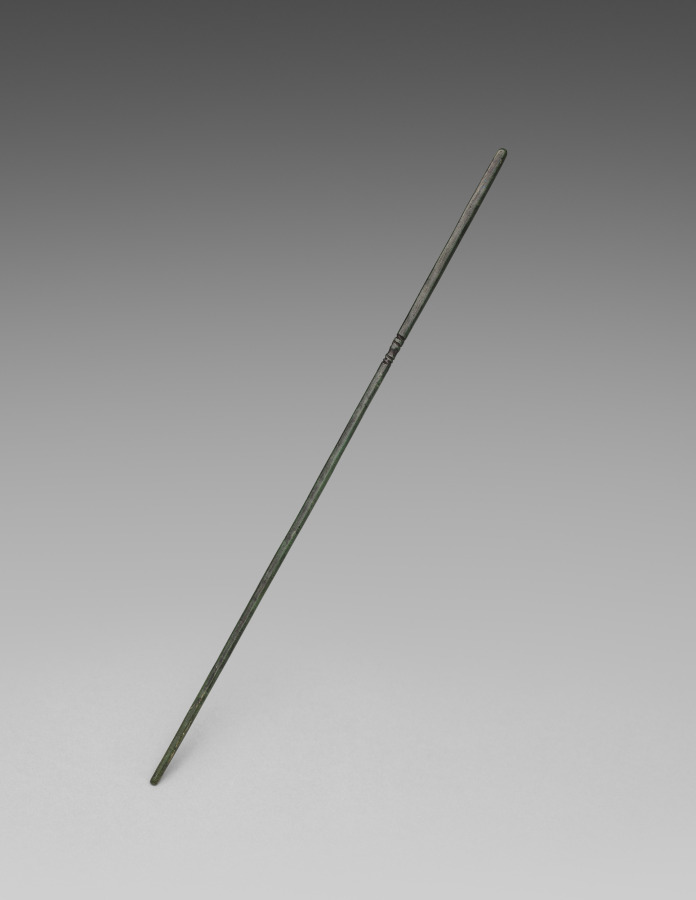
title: Chopstick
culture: Korea, Goryeo dynasty (918–1392)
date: 918–1392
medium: bronze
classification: Metalwork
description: In Korea, chopsticks made of metal such as brass, silver, and gold were excavated from ancient tombs and ruins dated to the 6th century at the earliest. Burial goods often include utilitarian objects such as table wares and utensils because the dead were believed to need them in the afterlife.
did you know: In contrast to the Chinese and Japanese, Koreans still prefer metal chopsticks (stainless steel and brass) to wooden ones.